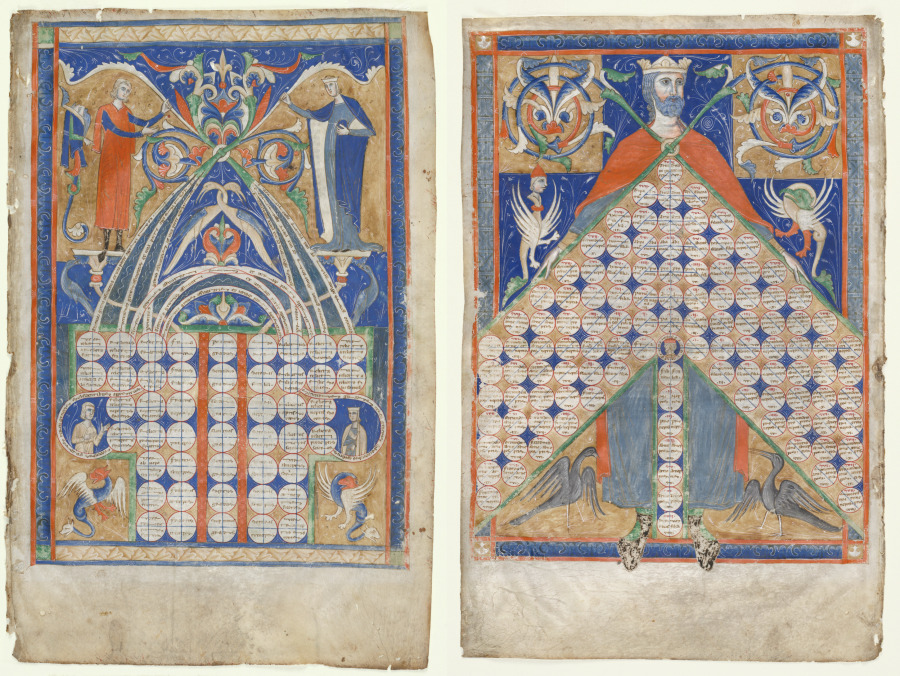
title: Leaves from Gratian's Decretum: Table of Affinity and Table of Consanguinity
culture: Italy, probably Naples, 13th century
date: c. 1270–1300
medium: tempera and gold on parchment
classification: Manuscript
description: These leaves were excised from a copy of the handbook of canon law known simply as the Decretum written by Gratian, an Italian Camaldolese monk, in Bologna around 1130-40. The Decretum was widely copied and consulted throughout the Middle Ages. These tables were used to determine relationships created by marriage. During the Middle Ages such relationships of "affinity" could be impediments to subsequent marriages if one partner were to die. In the direct line, for example, a man may not marry his mother-in-law or his daughter-in-law, while in the collateral line a man may not marry his uncle's wife or his wife's first cousin or niece. Like Tables of Consanguinity, Tables of Affinity were used by church officials to approve or deny marriages.